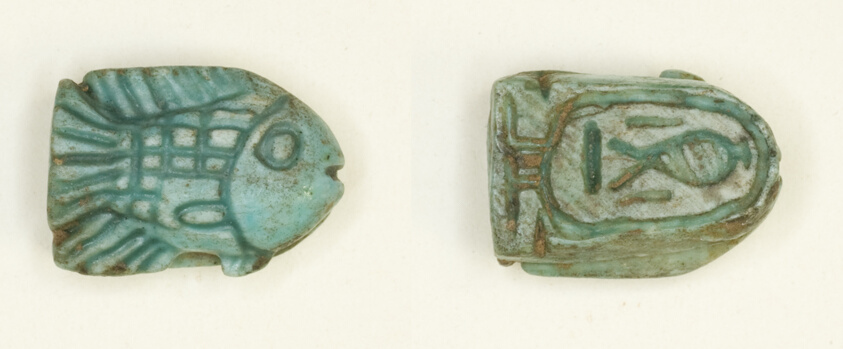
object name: Costume and Accessories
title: Scaraboid: Fish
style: new kingdom, ancient, egyptian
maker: Egyptian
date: New Kingdom, Dynasties 18–19 (about 1550–1186 BCE)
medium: Glazed steatite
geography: Egypt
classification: scaraboids; amulet; ancient art; costume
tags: fish, Hieroglyphs, cartouches